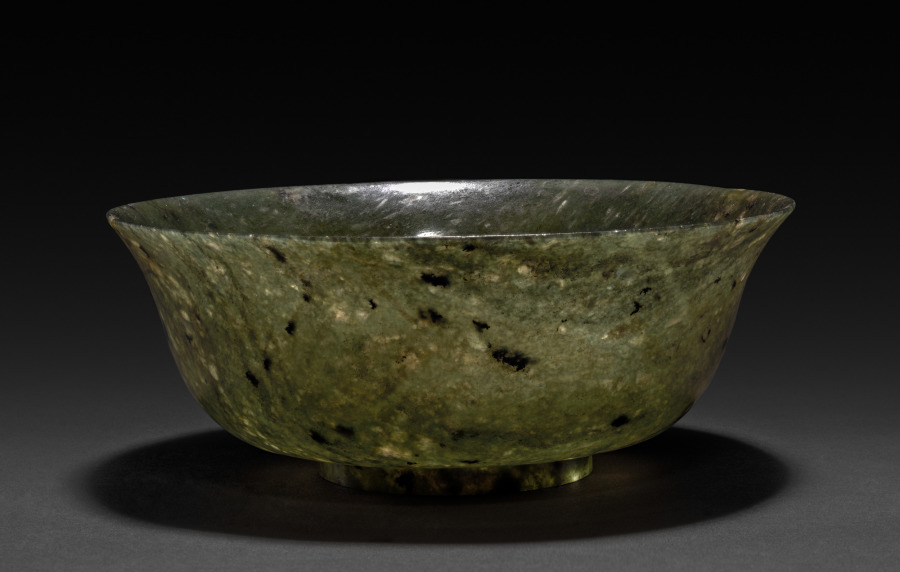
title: Bowl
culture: China, Qing dynasty (1644–1911), Qianlong reign (1736–95)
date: 1736–95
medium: spinach jade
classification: Jade